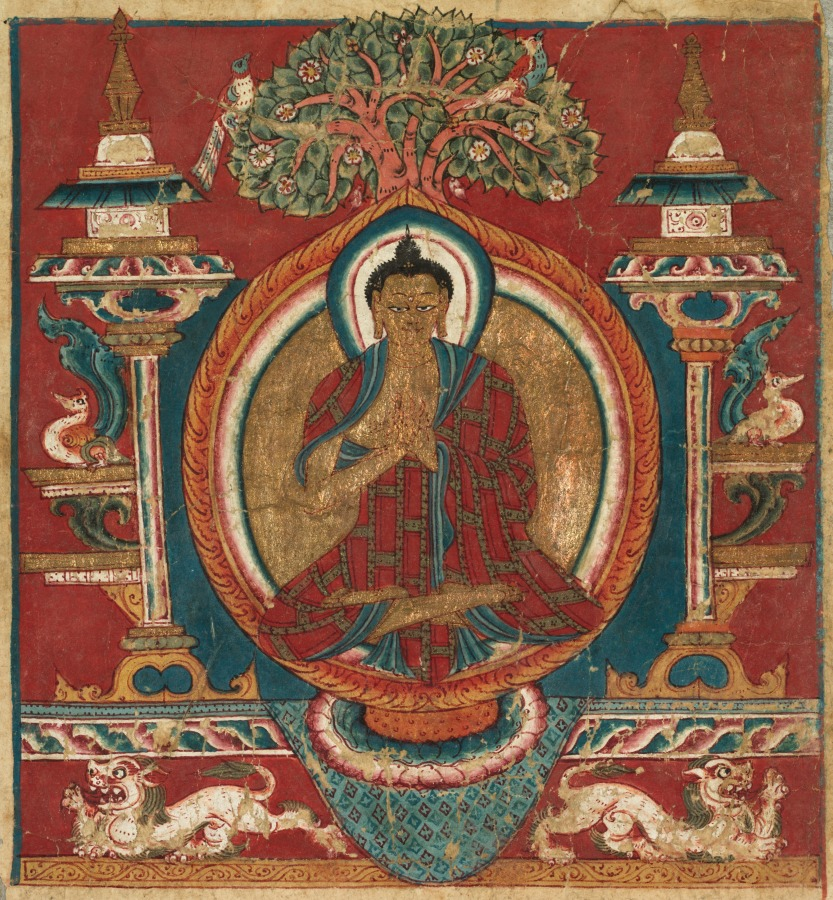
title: Votive initiation card (tsakali) with preaching Buddha Shakyamuni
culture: Western Tibet, Tholing Monastery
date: 1000s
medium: Gum tempera, ink, and gold on paper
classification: Painting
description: Buddhism was introduced to Tibet in the 7th century, but the persecution that followed in the 9th and 10th centuries destroyed all artifacts of the period. Consequently the earliest existing Buddhist art from Tibet dates to the 11th and 12th centuries, the so-called period of the Second Diffusion of Buddhism, yet few 11th- or 12th-century paintings survive. This miniature painting is one of these rare paintings. Not a manuscript illustration, it was conceived as a separate votive painting, a so-called tsa-kali. It was recovered from the Tholing Monastery, which was founded by Rinchensangpo (958-1055), the famous translator of Buddhist scriptures, who acted on the order of Yesheö, the king of Guge. Yesheö was also the father of "Lhatsun Nagaraja" (active 998-1026) whose name is inscribed on the museum's early Himalayan bronze statue of a Standing Buddha (1966.30)—one of the most important and beautiful Himalayan bronzes to survive. The museum's collection includes another important sculpture from the western Himalayas: the colorful wooden sculpture of a Seated Buddha (1986.6). The two sculptures date from the 11th century and provide a meaningful comparison with this painting, which replicates their style.